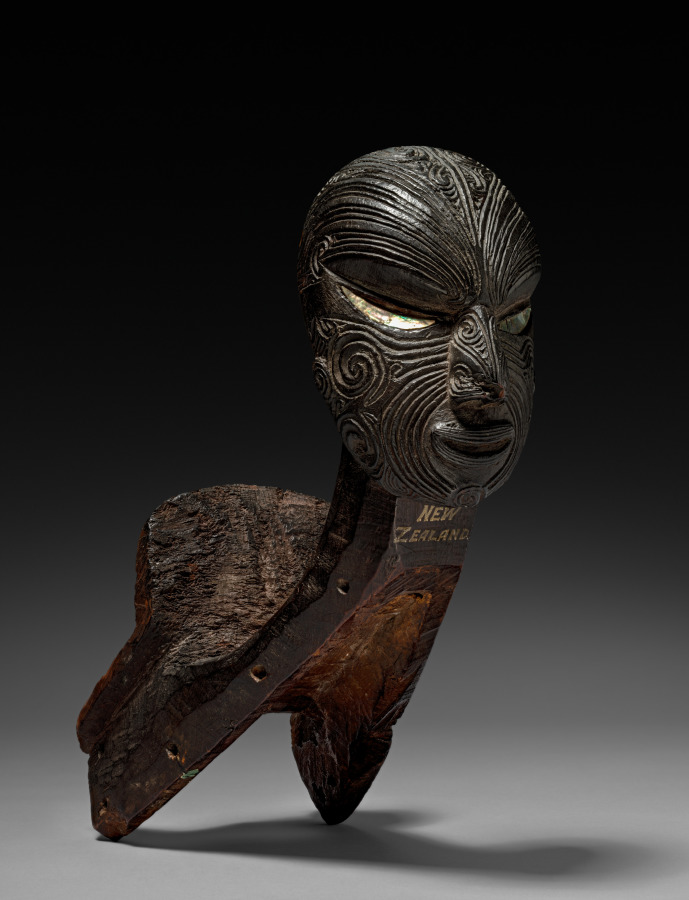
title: Fishing Canoe Prow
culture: Polynesia, New Zealand, Maori people, 19th century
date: 1800s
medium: wood with haliotis (pearl) shell inlay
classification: Sculpture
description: Intricate surface patterning characterizes Maori wood carvings. The swirls and spirals covering the face on this canoe prow replicate traditional facial tattoo patterns. Similar designs were used for post and gable figures that adorned both dwellings and compounds.